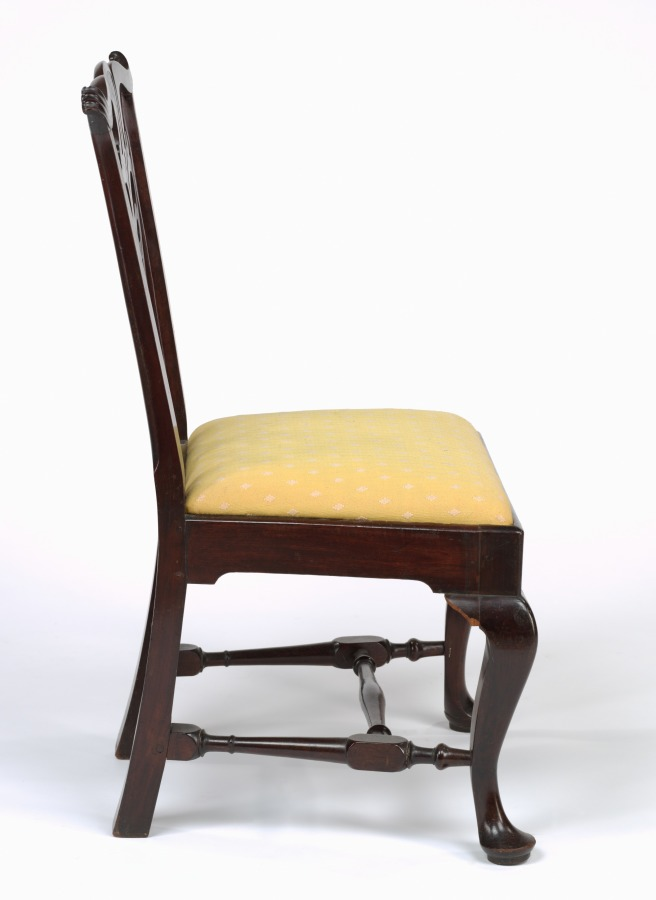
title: Side Chair (2 of 2)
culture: America, Rhode Island, Newport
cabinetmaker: John Townsend (American, 1732–1809)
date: c. 1775–90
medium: mahogany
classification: Furniture and woodwork